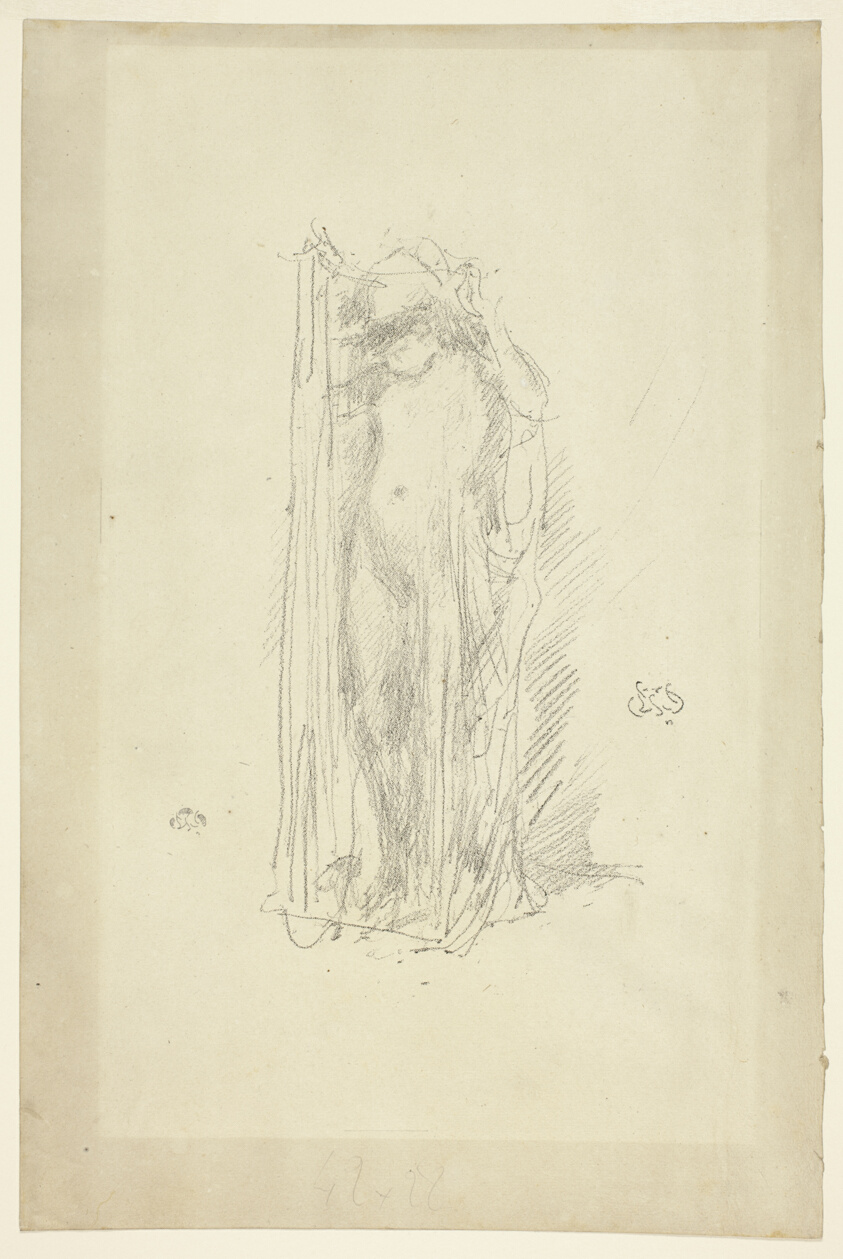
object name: Print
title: Model Draping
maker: James McNeill Whistler (American, 1834-1903)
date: probably 1889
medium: Transfer lithograph in black on cream laid paper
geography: United States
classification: transfer lithograph; lithograph; print; prints and drawing; paper